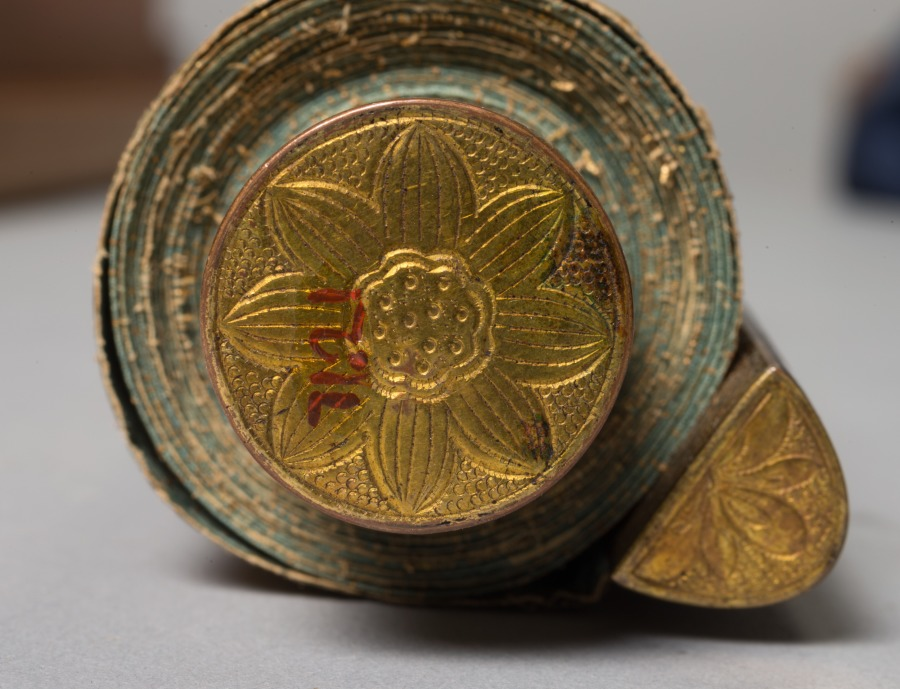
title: Monju with Five Hair Knots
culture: Japan, Kamakura period (1185–1333)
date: late 1200s–early 1300s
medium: Hanging scroll; ink, color, gold, and cut gold on silk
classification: Painting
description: This Buddhist painting shows Monju, Manjushri in Sanskrit, riding a lion. Monju is a bodhisattva, a being who, though enlightened, chooses not to become a Buddha but instead helps others achieve enlightenment. Monju’s youthfulness symbolizes his pure wisdom, unsullied by the world, and his five hair knots represent his vow to keep calamity at bay. The supernatural nature of his lion is emphasized by its hair, every strand painted in gold, as well as by the lotus platforms beneath each of its feet. The boy’s bejeweled body and silk finery is meant to resemble that of an Indian prince.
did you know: This painting is exemplary of the Kamakura period, known for artworks with special attention paid to the realism of images.